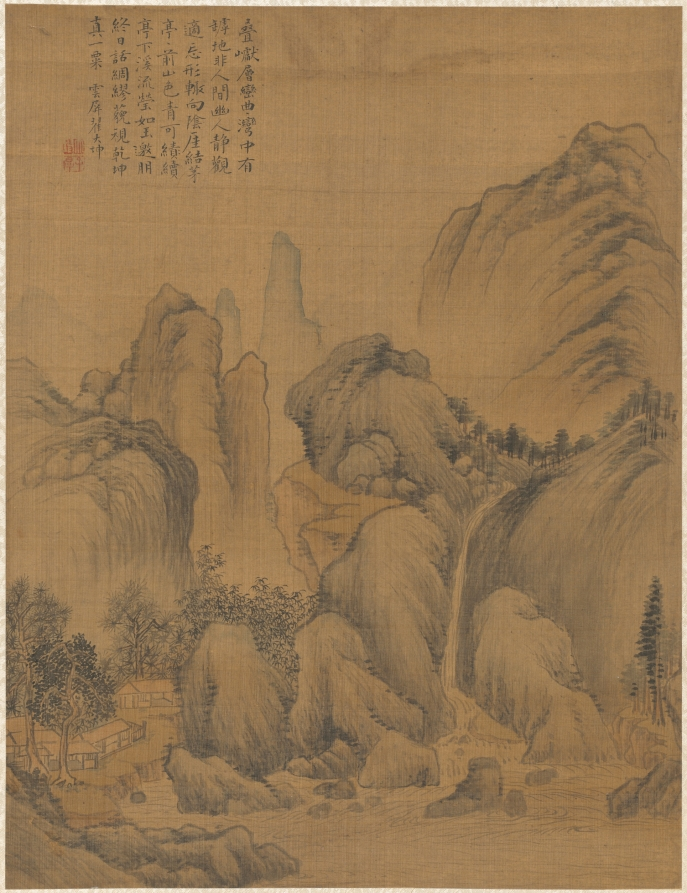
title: Landscape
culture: China, Qing dynasty (1644-1911)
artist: Zhai Dakun (Chinese, d. 1804)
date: 1775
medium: album leaf; ink and color on silk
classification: Painting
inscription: Folded hills and layered peaks curve back and forth, Among them is a ravine removed from the world or men. There a recluse mediates, intent on "forgetting forms," Often he faces the dark cliffs where he has built a thatched hut. Below the pavilion, the flowing stream is as lustrous as jade. With an invited friend one spends the entire day in intimate conversation, Treating Heaven and Earth as nothing more than a speck. Yunping Zhai Dakun Seals: 1) r/i "Dakun" 2) r/r "Zihou"